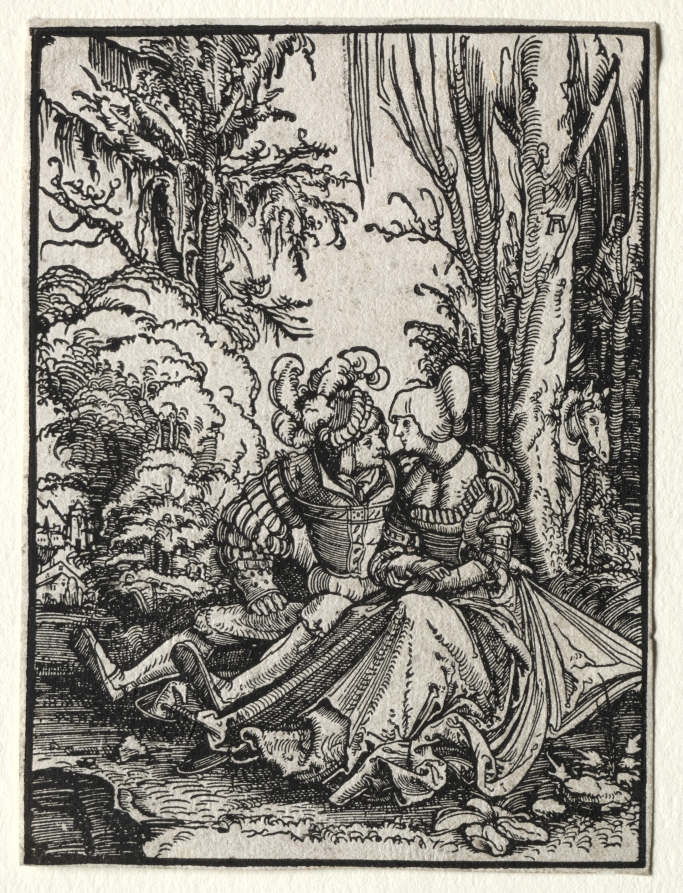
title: The Lovers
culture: Germany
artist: Albrecht Altdorfer (German, c. 1480–1538)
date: 1511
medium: woodcut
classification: Print